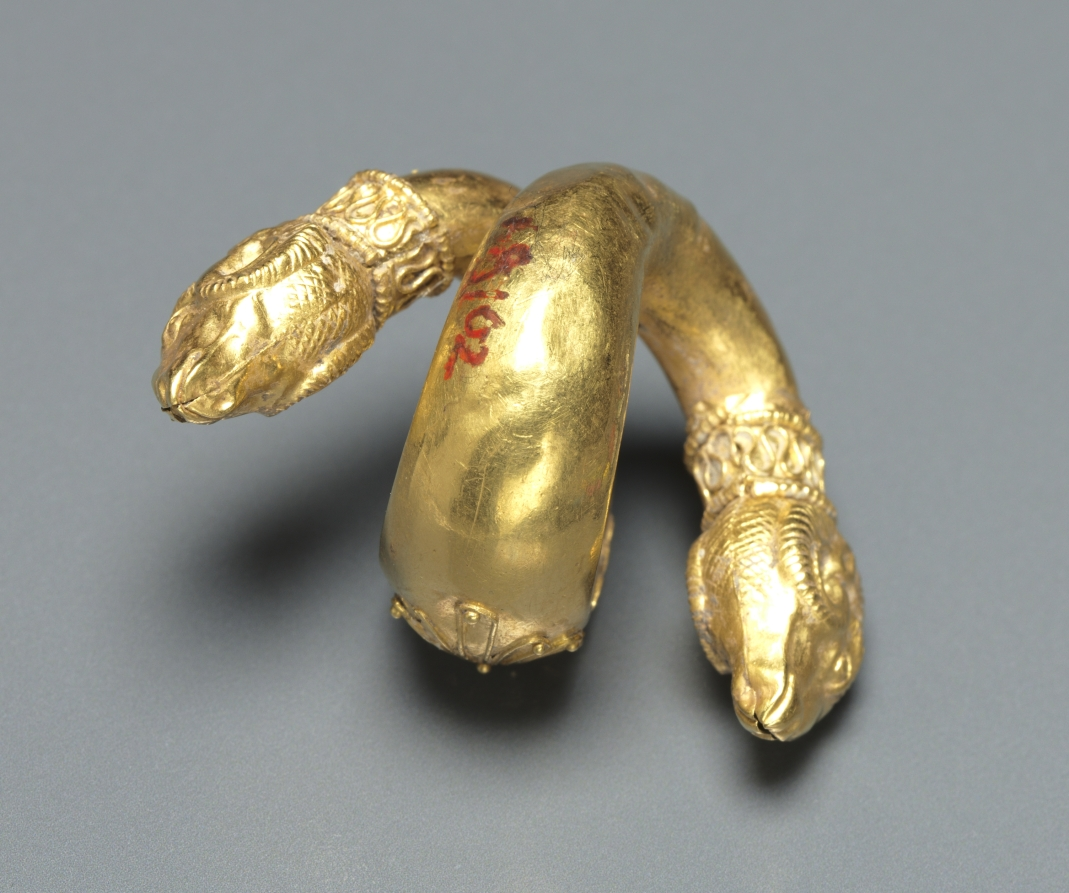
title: Hair Ringlet with Ram Head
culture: Greece, Hellenistic period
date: 400s BCE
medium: gold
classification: Jewelry